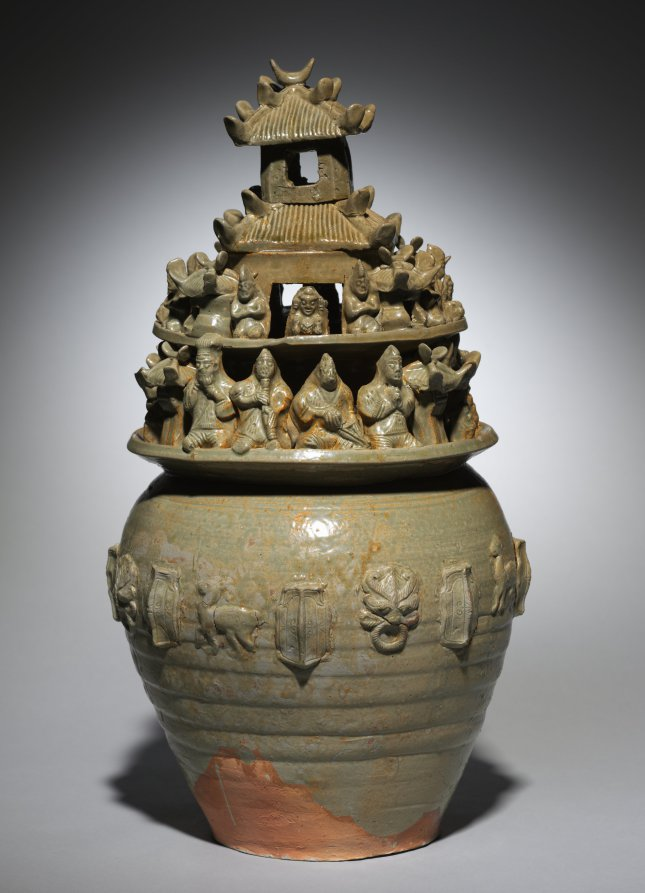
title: Funerary Urn (Hunping)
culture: China, Western Jin dynasty (265–316 CE)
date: late 200s CE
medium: green-glazed stoneware with molded and sculpted decoration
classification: Ceramic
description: Green-glazed stoneware developed greater variety in the south after the Han dynasty. Large funerary urns known as hunping, or "the urn of the soul," are evidence for its prolific production. This type of urn features multistoried towers populated by human figures, animals, and birds. It was likely associated with the southern funerary tradition of "summons of the soul." The wandering soul of the deceased was summoned to return. The urn with architectural designs (sometimes with grains placed inside) provided a safe place of refuge.